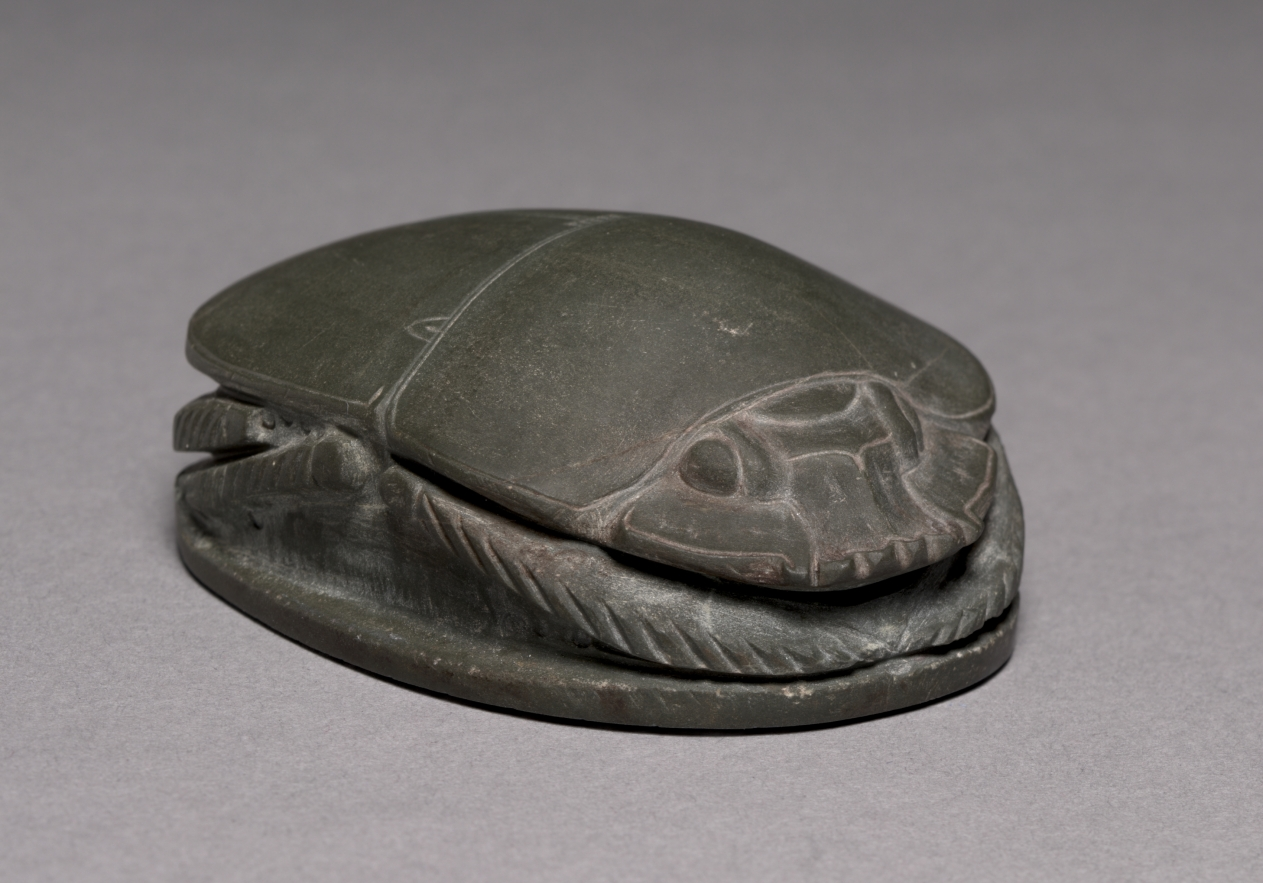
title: Heart Scarab of Nefer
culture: Egypt, New Kingdom (1540–1069 BCE), Dynasty 18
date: 1540–1296 BCE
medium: graywacke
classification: Scarabs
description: The design features in these objects borrow various ancient Egyptian funerary elements. The scale illustrated on top of the Cartier vanity case refers to the scale used in Osiris’s final judgment of the deceased. Amulets like the heart scarab were essential to the mummification process. They were placed throughout the mummy’s wrappings to protect the deceased during their journey in the afterlife. These inspired the Dior brooch seen on the model here. The ancient Egyptians believed amulets carried spells and that some, like the heart scarab, could sway opinions during the final judgement to help the deceased get to their version of heaven, called Iaru.